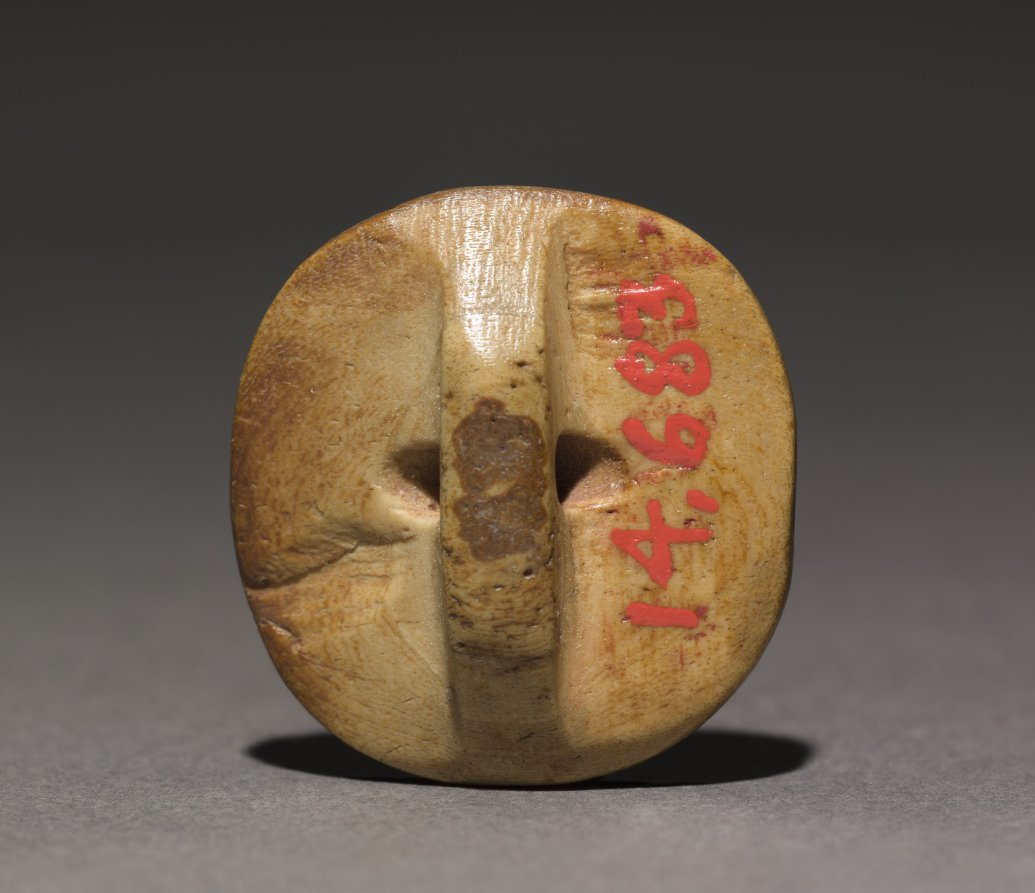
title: Seal Amulet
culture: Egypt, Old Kingdom (2647–2124 BCE), Dynasties 5–6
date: 2300–2124 BCE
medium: bone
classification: Amulets